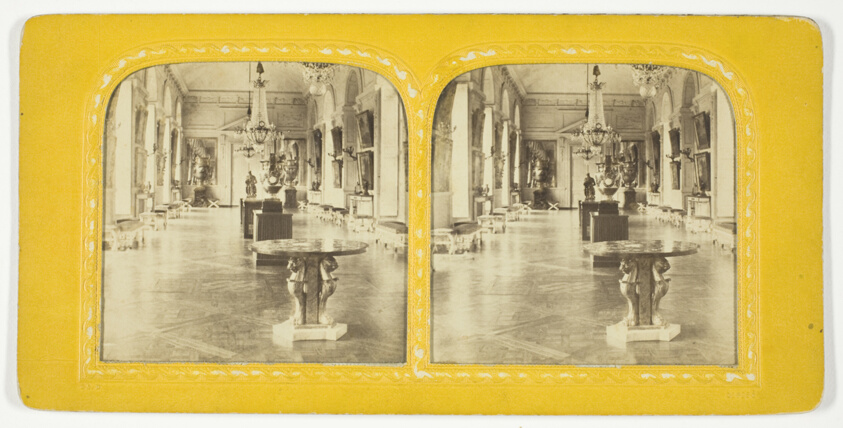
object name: Photograph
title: Untitled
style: 19th century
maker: Deposé (French, active late 19th century)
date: 1875/99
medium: Albumen print, stereo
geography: France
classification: photography; photograph